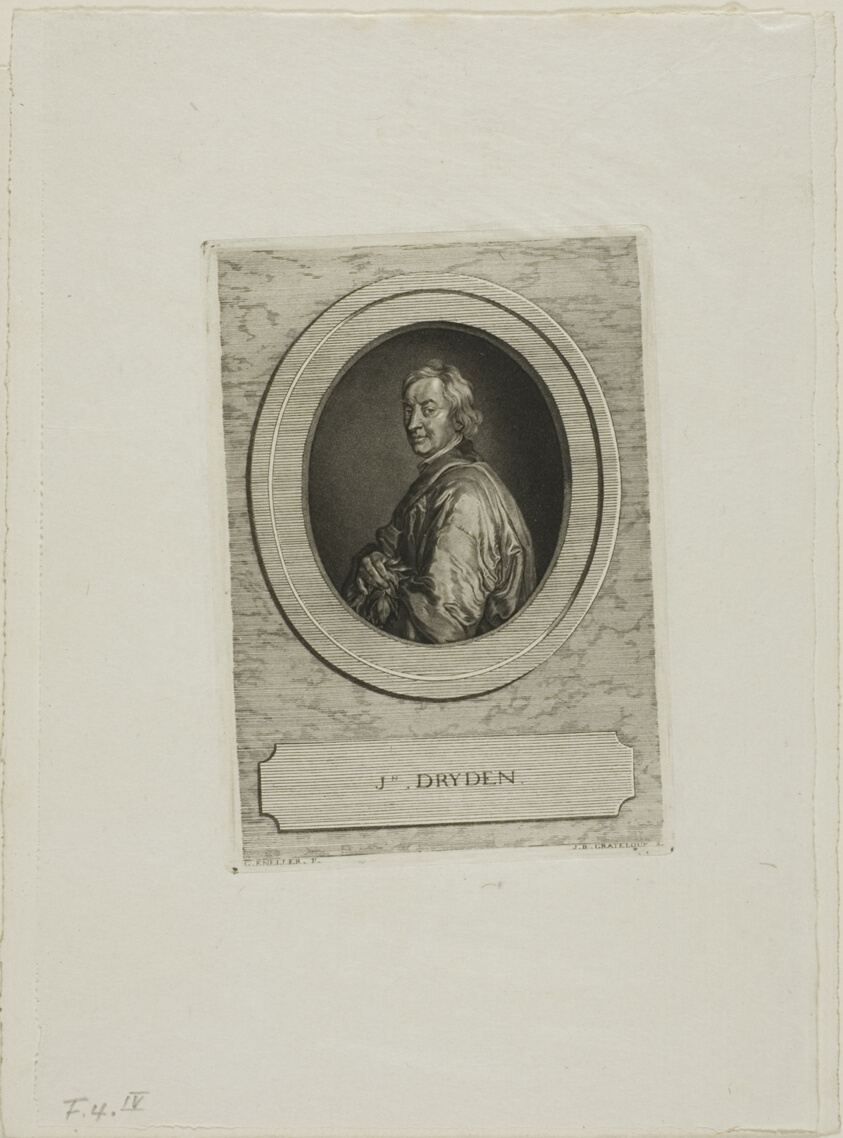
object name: Print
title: John Dryden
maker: Jean-Baptiste de Grateloup (French, 1735-1817)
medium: Aquatint on paper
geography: France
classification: aquatint; print; prints and drawing